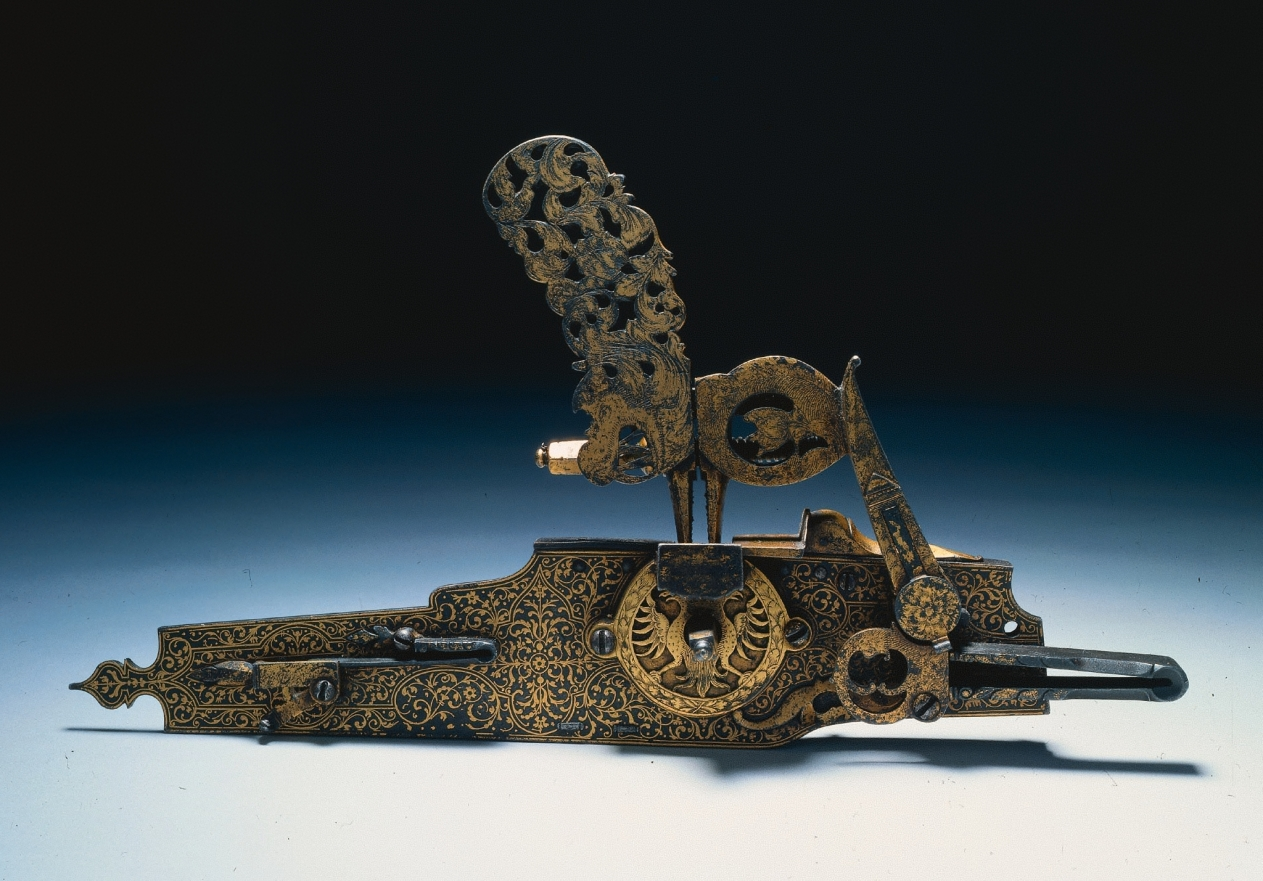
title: Wheel-Lock from a Hunting Rifle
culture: Austria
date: c. 1660–1720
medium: steel, inlaid with gold design of Habsburg eagle, pierced and chiseled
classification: Arms and Armor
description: Originally part of a deluxe weapon, the lock plate's entire surface is inlaid with an exquisite floral pattern in gold. Carefully chiseled, the fanciful hammer takes the form of an animal head crowned by a mass of foliage. The double eagle on the wheel plate suggests the weapon was made for a member of the Habsburg family.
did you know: Invented in the early 1500s, the wheel-lock was a new type of ignition system, the first to be self igniting.